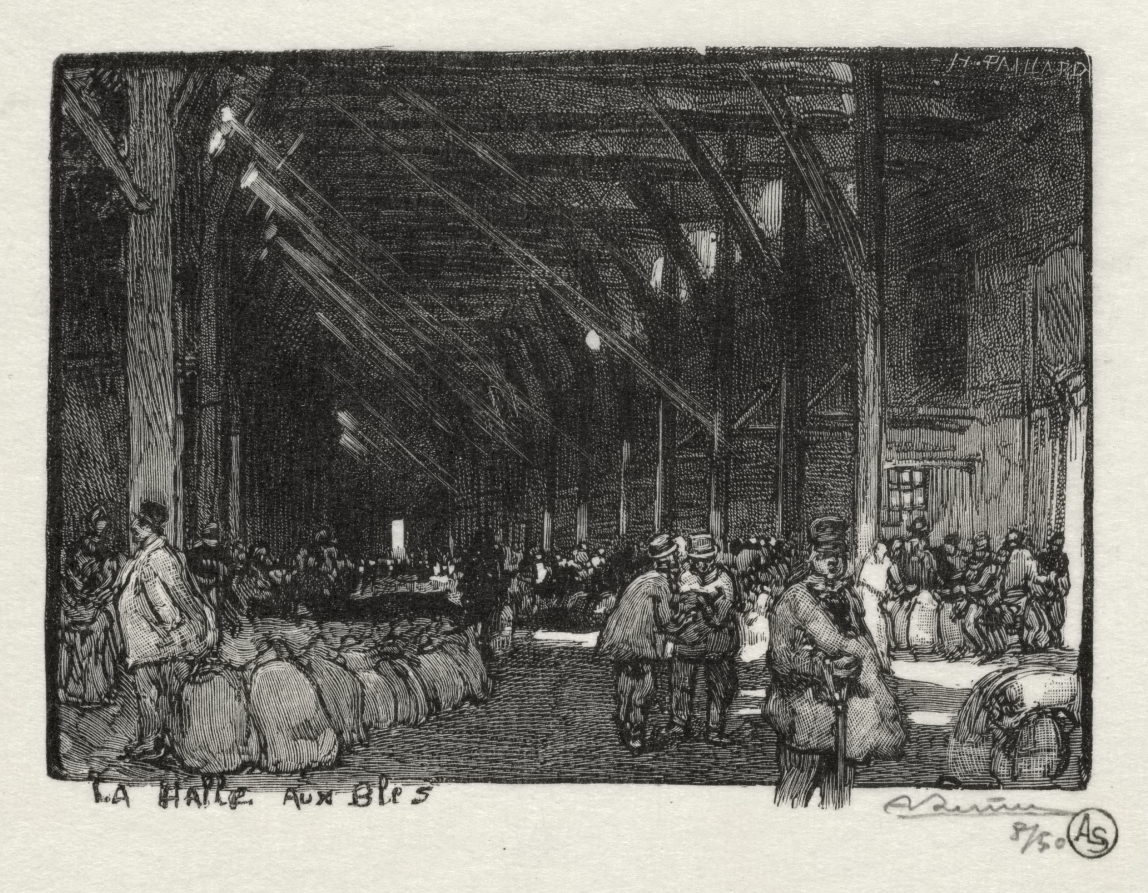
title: Rouen Illustré: La Halle aux Blès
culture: France, 19th century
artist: Auguste Louis Lepère (French, 1849–1918)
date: 1896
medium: wood engraving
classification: Print